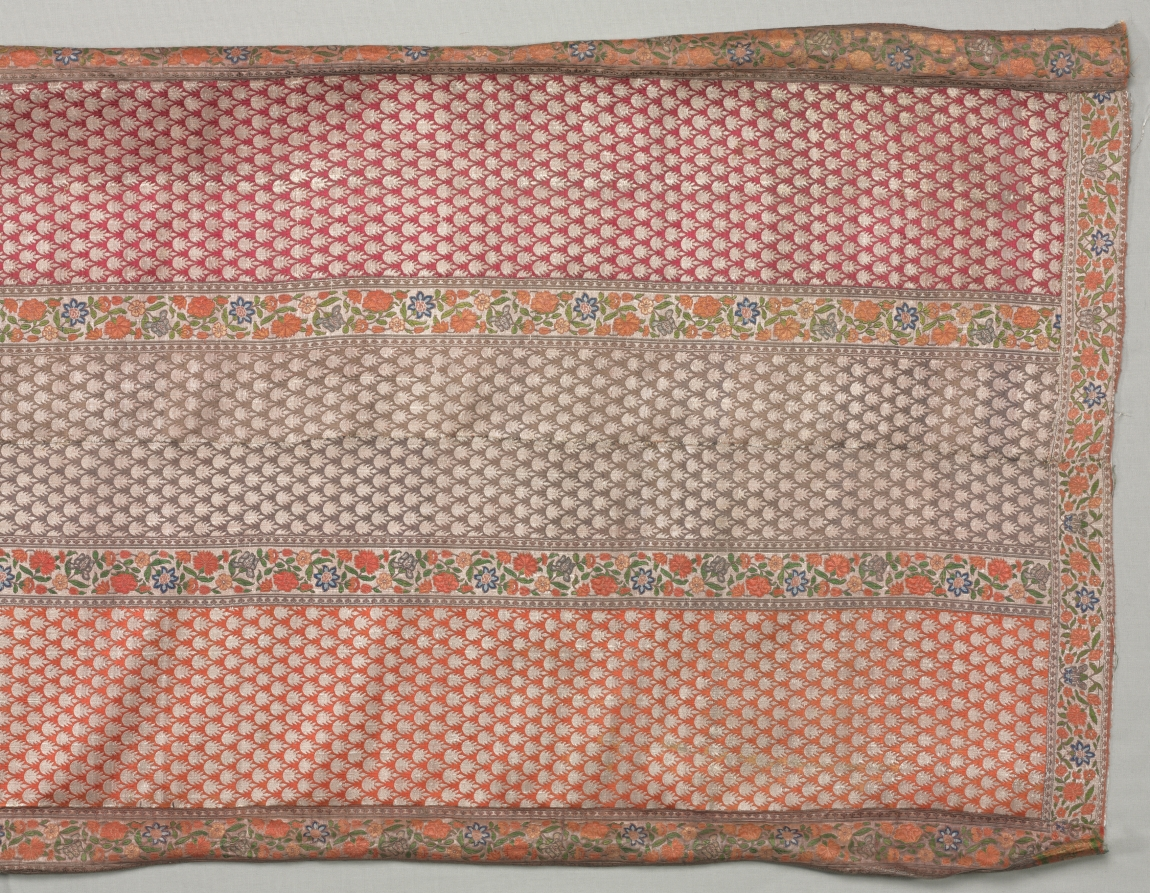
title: Sash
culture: Iran, 18th century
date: 1700s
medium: Silk taquete, brocaded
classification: Textile